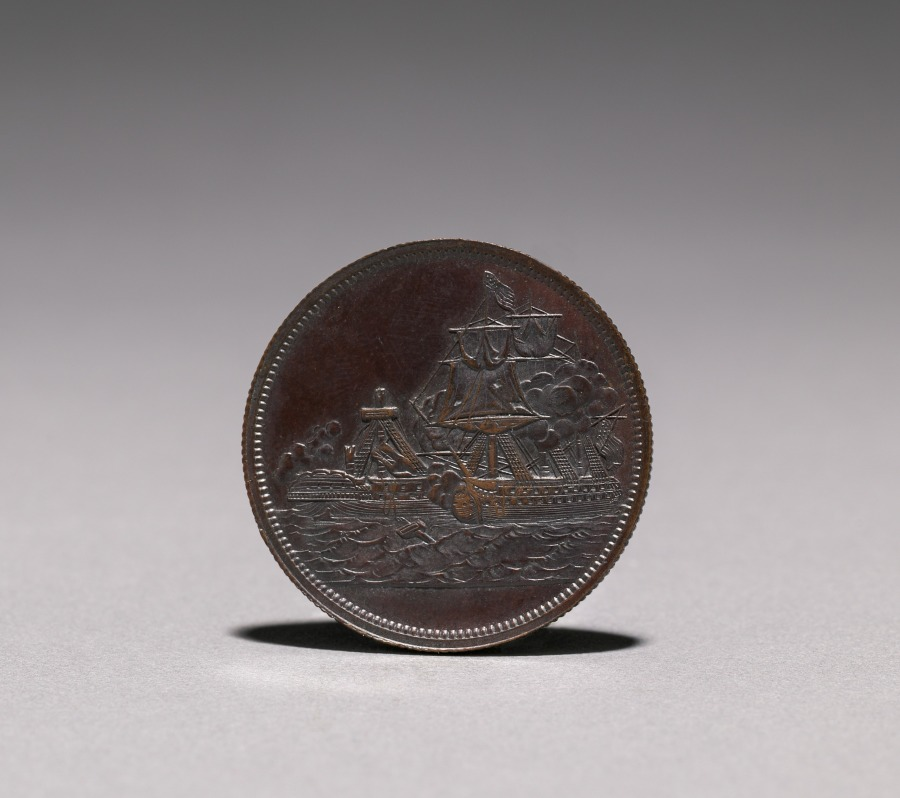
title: Medal: Constitution and Guerriere, 1812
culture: America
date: 1812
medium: bronze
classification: Metalwork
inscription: Constitution and Guerriere, 1812. Free Trade and sailors rights.